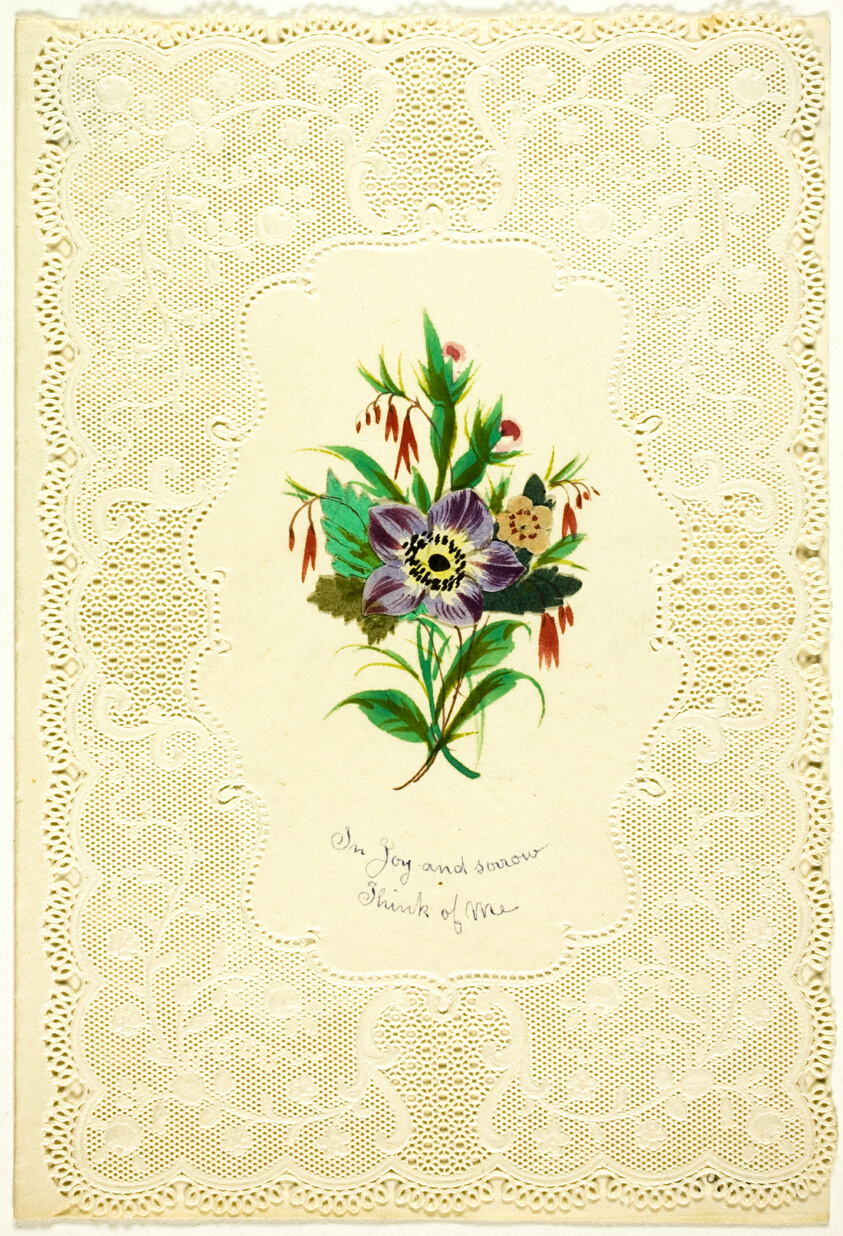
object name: Drawing and Watercolor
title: In Joy and Sorrow Think of Me (valentine)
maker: Unknown Artist; English, 19th century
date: c. 1840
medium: Collaged elements and watercolor, with pen and blue ink on cut and embossed ivory wove paper (lace)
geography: England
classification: valentine; prints and drawing; paper